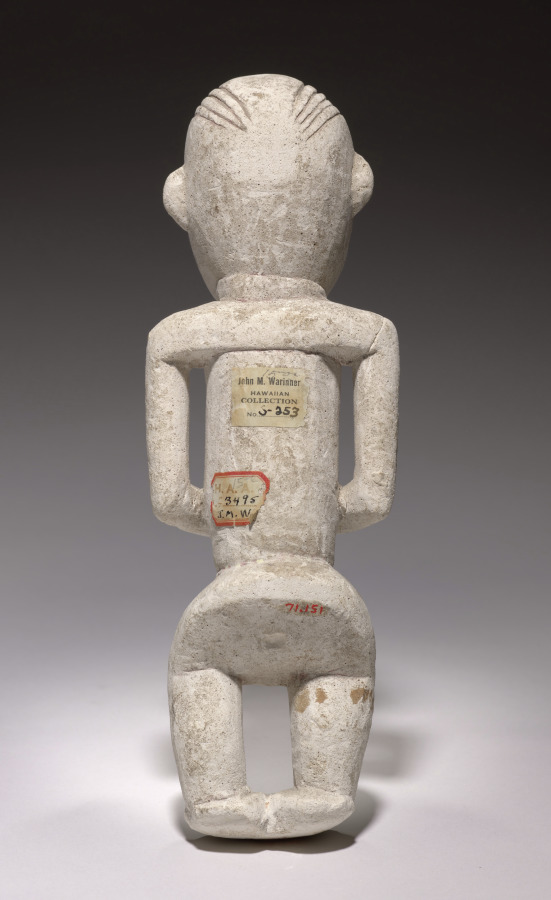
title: Male Ancestor Figure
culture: Melanesia, Central New Ireland, Namatani District, 20th century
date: before 1930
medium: limestone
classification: Sculpture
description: Carved and painted chalk figures from New Ireland served as repositories for the spirits of deceased men and women during funeral rituals. After the ceremony, the figures were destroyed or discarded, allowing the spirits to join their ancestors.